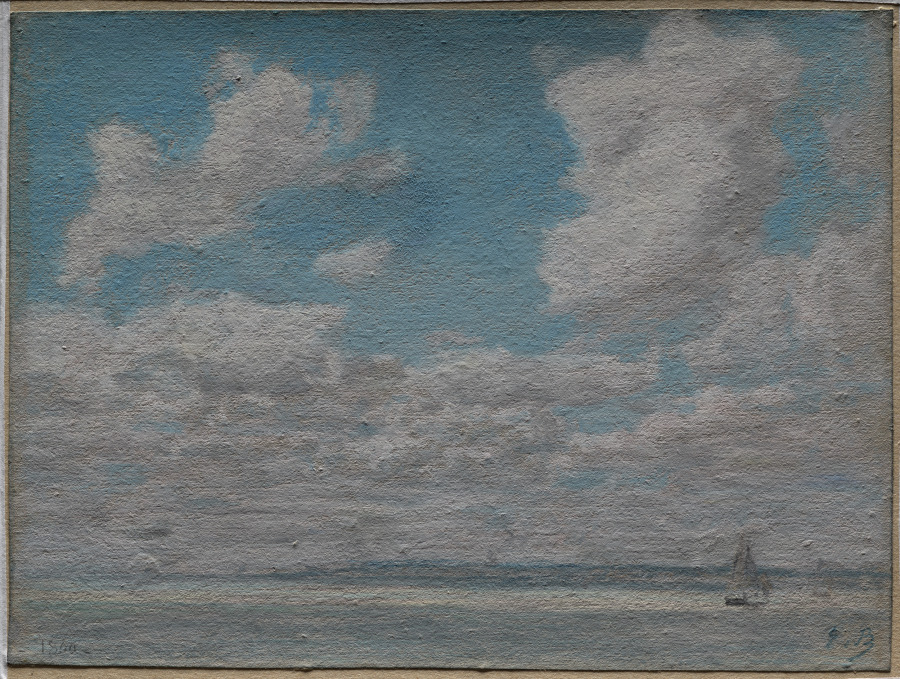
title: Seascape with Open Sky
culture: France, 19th century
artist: Eugène Boudin (French, 1824–1898)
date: 1860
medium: pastel on gray wove paper mounted on thin paperboard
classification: Drawing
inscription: inscribed, lower left, in black chalk: - 1860 -; stamped, lower right, in blue ink: artist’s stamp [Lugt 828]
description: Eugène Boudin is best known for inspiring Impressionist artists, especially a young Claude Monet, to paint outdoors. This drawing belongs to a series that Boudin made throughout much of his career depicting seascapes with dramatic skylines onsite. He favored pastel, the powdery medium used here, for its portability and directness, allowing him to capture the dramatic effects of nature as they shifted.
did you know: The well-known Parisian critic and writer Charles Baudelaire singled out Eugène Boudin's seascape pastels in a review published around the time this work was made, describing them as characterized by "meteorological beauty."